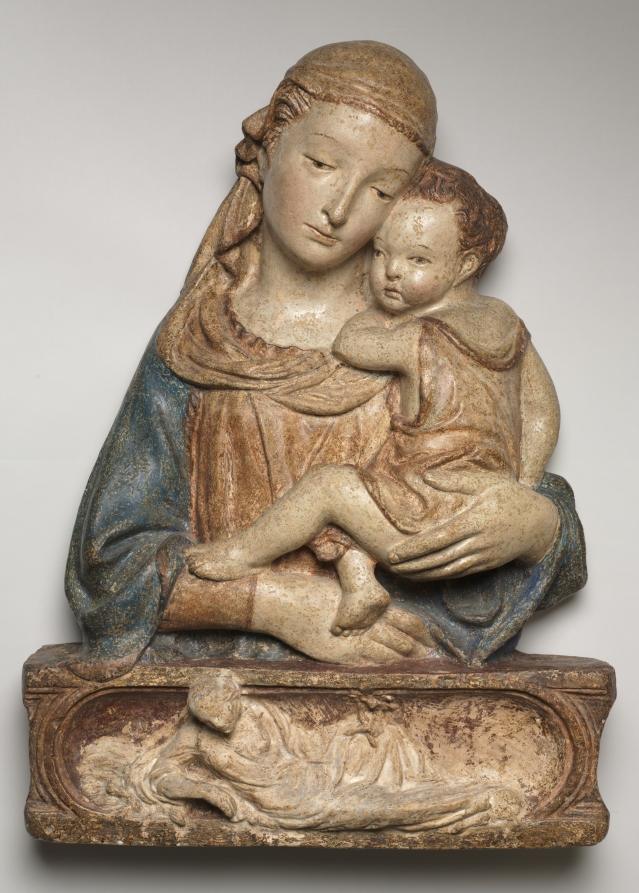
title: Madonna and Child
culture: Italy, Florence, 15th century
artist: circle of Lorenzo Ghiberti (Italian, 1378–1455)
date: c. 1450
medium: polychromed terracotta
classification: Sculpture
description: This half-length Madonna represents one of the finest of about 40 surviving variants, all of which display many characteristics of the Florentine bronze sculptor Lorenzo Ghiberti. These features include serene facial types with narrow eyes and thin eyebrows, the careful arrangement of the Madonna and Child, forehead to cheek, and the infant's twisting pose. The popularity of this devotional relief began around 1420 and continued until around 1500. Ghiberti was the most successful bronze sculptor of the early Renaissance in Florence. His fame rests upon the commissions he received for two sets of bronze doors, completed between 1401 and 1424, for the Baptistry in Florence. The reclining figure of Eve on the base of this Madonna and Child (suggesting Mary as the new Eve) stems from a similar figure on the upper left door of the Porta del Paradiso, the second set of Baptistry doors. Eve's presence on the base clearly substantiates the attribution to Ghiberti and helps date the relief.